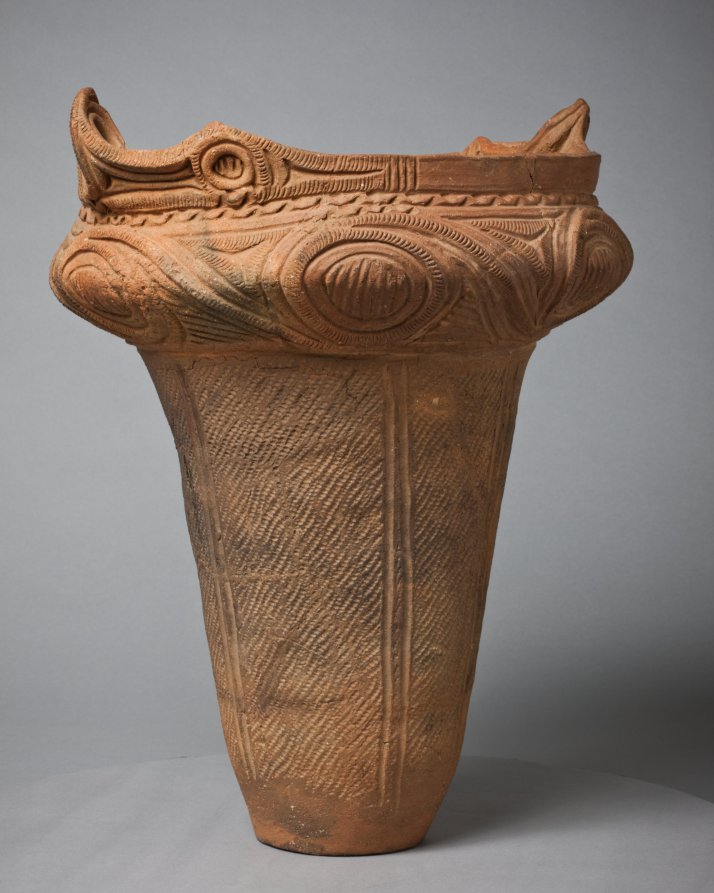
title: Urn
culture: Japan, Jōmon period (c. 10,500–300 BCE)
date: c. 2000 BCE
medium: earthenware, terracotta, impressed and incised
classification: Ceramic